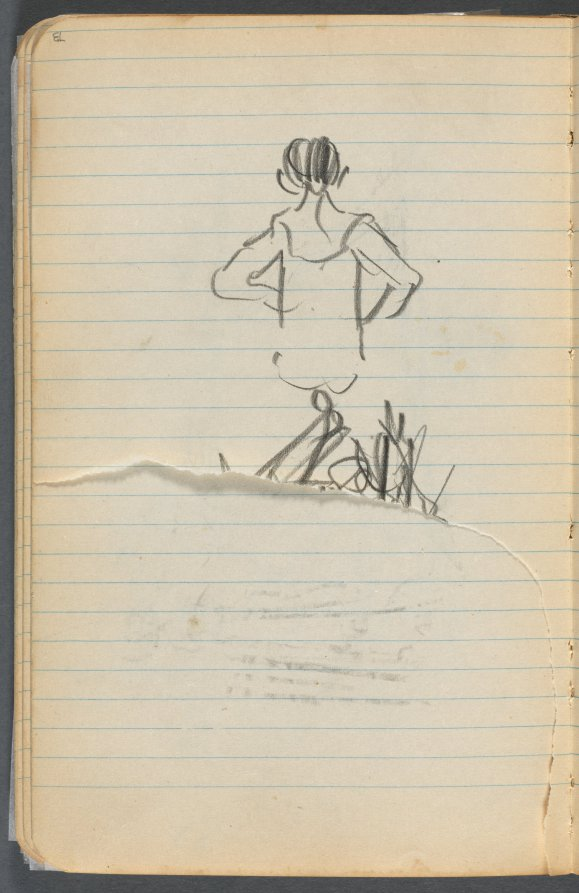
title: Sketchbook, page 073: Male Figure seen from the back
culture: America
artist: Maurice Prendergast (American, born Newfoundland [now Canada], 1858–1924)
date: 1905–10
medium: graphite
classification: Bound Volume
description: This sketchbook contains 69 pages of drawings, a diary largely devoted to the state of the artist's health, and a three-page discourse on the nature of genius and ideas.